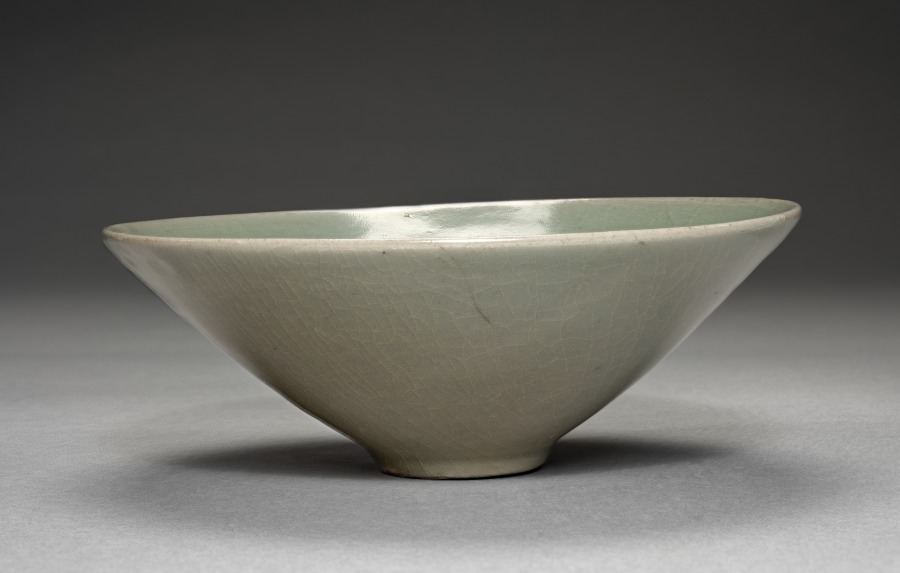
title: Bowl with Cloud Design in Relief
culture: Korea, Goryeo dynasty (918–1392)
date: 1100s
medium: glazed porcelain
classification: Ceramic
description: As early as the 600s, the practice of drinking tea and wine became an important part of elite leisure culture in Korea. A wide bowl like this example was especially suitable for drinking powdered tea shaved from a compressed tea cake, the most commonly enjoyed type during the Goryeo period. The pale bluish green glaze indicates that this tea bowl was created in the 12th century, the time when the production of celadon reached its technical peak.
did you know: Kangjin and Buan kilns in Jeolla province were the two major production centers for celadon wares during the Goryeo period (918–1392).